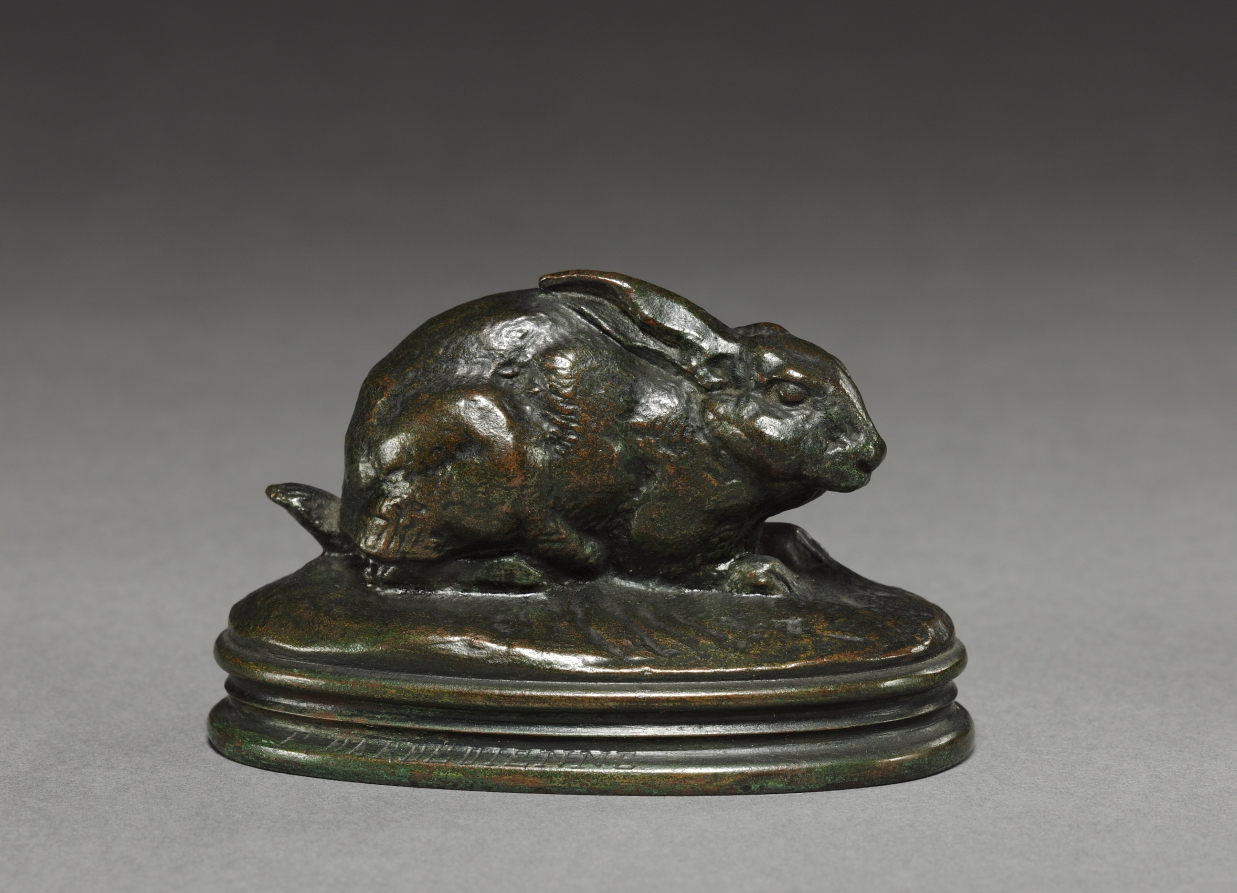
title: Hare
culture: France, 19th century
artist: Antoine-Louis Barye (French, 1796–1875)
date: c. 1830 – 1875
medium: bronze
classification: Sculpture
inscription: Signed on base top rear: "Barye"